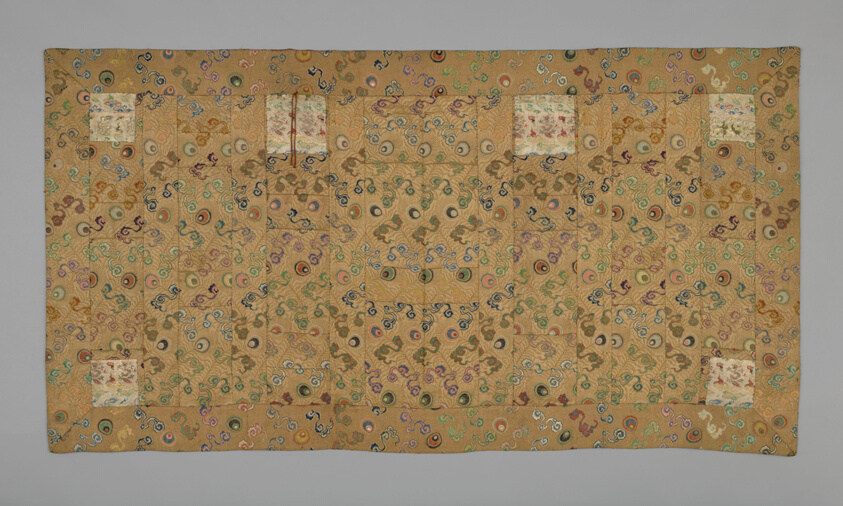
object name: Textile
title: Kesa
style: edo (japanese period)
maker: Japan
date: Edo period (1615–1868), late 18th century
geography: Japan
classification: textile; costume; liturgical - buddhist; weaving